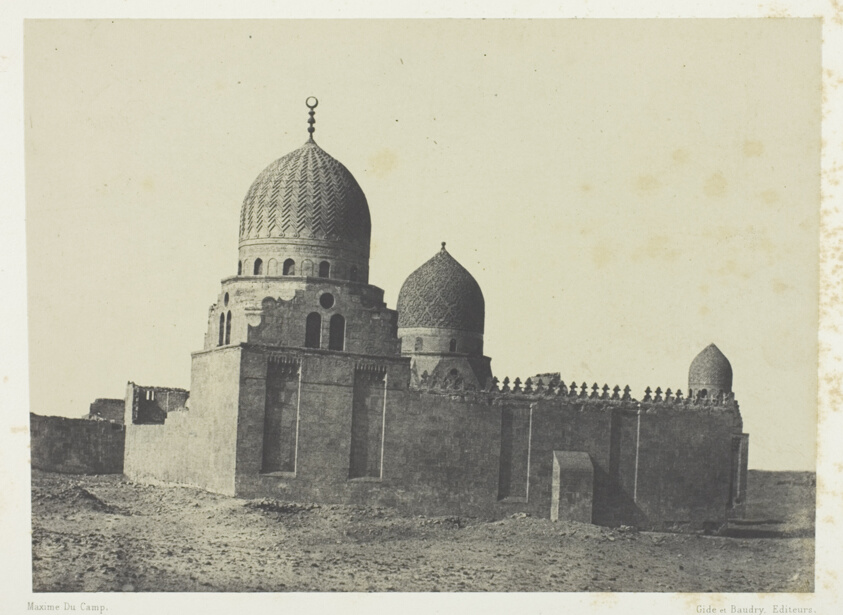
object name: Photograph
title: Tombeau de Sultans Mamelouks, Le Kaire, plate 8 from the album "Egypte, Nubie, Palestine et Syrie" (1852)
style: 19th century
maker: Maxime Du Camp (French, 1822–1894)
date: 1849/51, printed 1852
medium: Salted paper print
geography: France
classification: salted paper print; photographic process; photography; photograph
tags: Collected by Hugh Edwards, Egypte, Nubie, Palestine et Syrie